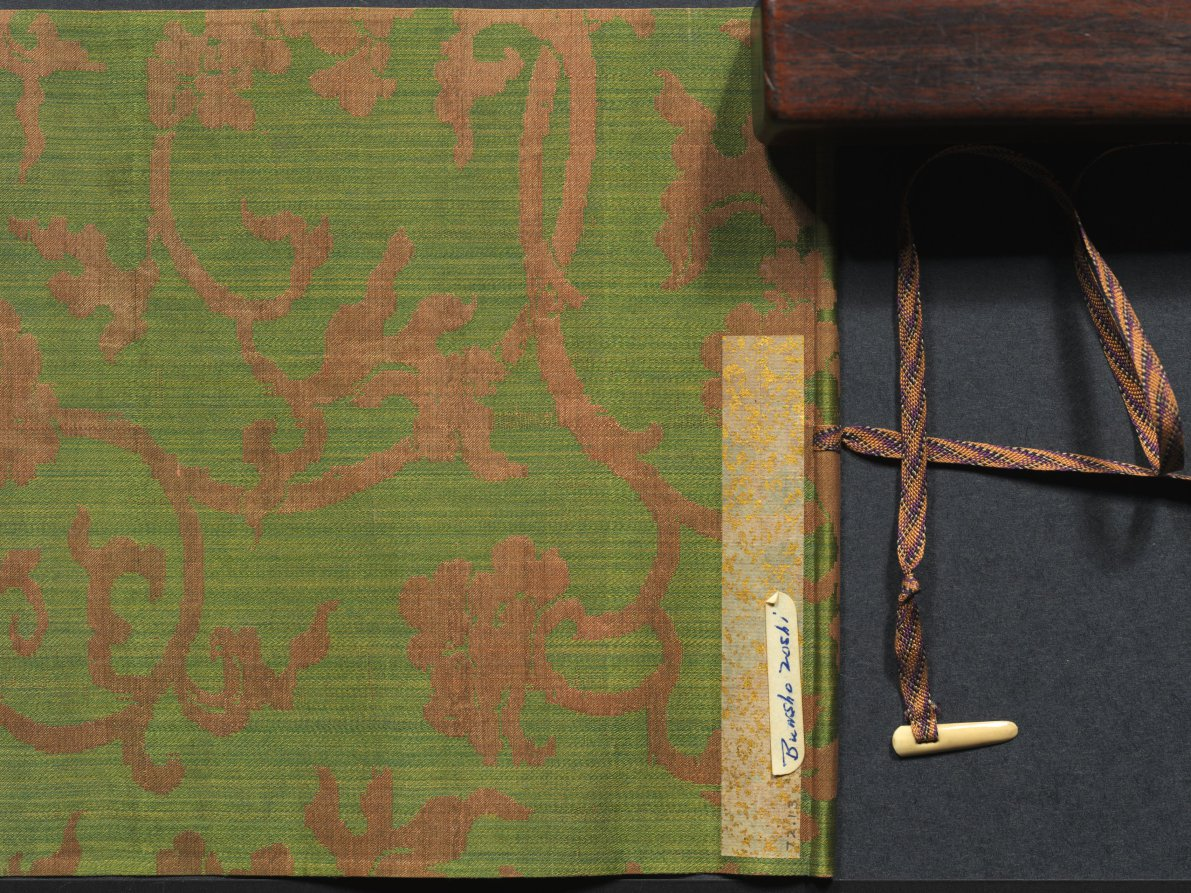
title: The Saltmaker's Story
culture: Japan, Edo period (1615–1868)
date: early 1600s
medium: One of a pair of handscrolls; ink, color, and gold on paper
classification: Painting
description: Once read and copied by girls at New Year’s celebrations and included in dowries, The Saltmaker’s Story is a rags-to-riches tale in which daughters are gifts from the gods. Despite his simple outlook, the main character progresses from humble roots as an associate at Kashima Shrine to the elite status of grandfather of the emperor through the intervention of the Kashima deity. The Saltmaker’s Story is traditionally presented in a set of three scrolls, but the text of this set has been removed by a previous owner, who remounted the illustrations as a pair. The paintings of this one take us from right to left through the second half of the tale.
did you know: This handscroll originally had texts before its paintings, but the texts were removed.